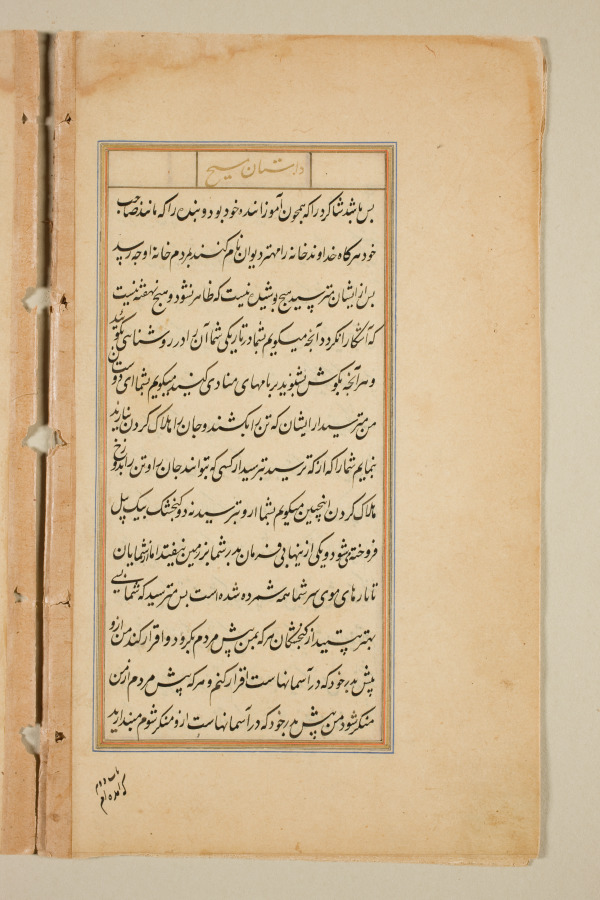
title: Text page from a Mirror of Holiness (Mir’at al-quds) of Father Jerome Xavier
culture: Mughal India, Allahabad, made for Prince Salim (1569–1627)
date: 1602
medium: Ink and gold on paper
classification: Manuscript